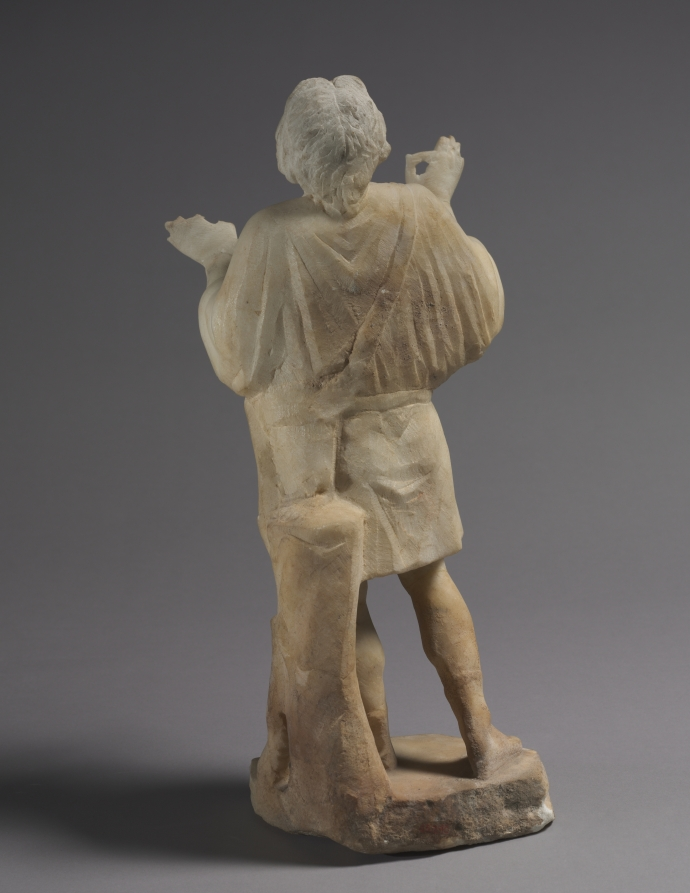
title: Jonah Praying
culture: Anatolia, late Roman-early Christian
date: 280–90 CE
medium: marble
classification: Sculpture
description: The Old Testament prophet Jonah is shown with his hands raised in prayer. It is unclear which moment of the biblical story of Jonah is depicted here. He may be praying in the belly of the sea monster. He might likewise be pleading with the Lord for the city of Nineveh’s destruction or lamenting the withering of the gourd beneath which he sought shelter after fleeing Nineveh.